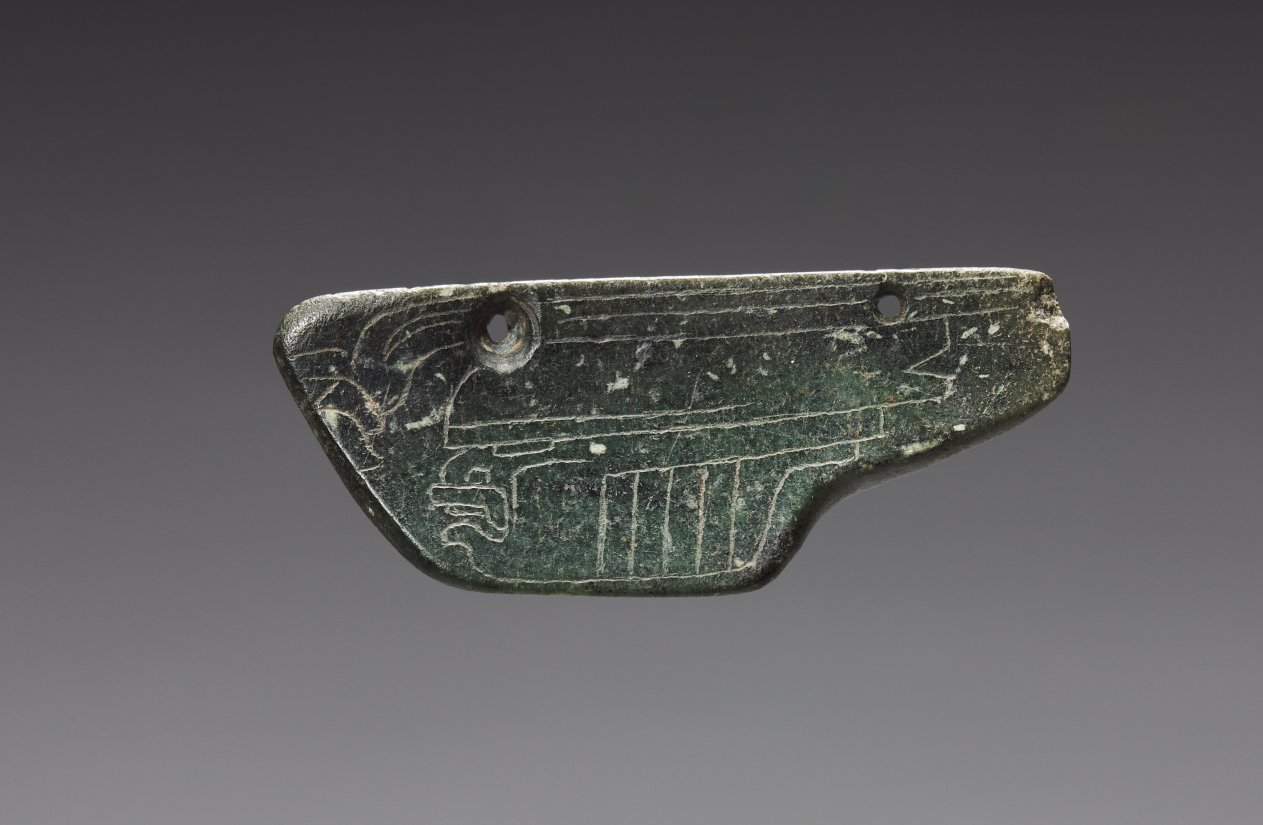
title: Mask Attachment(?)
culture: Mesoamerica, Mexico, Olmec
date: 900–300 BCE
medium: serpentine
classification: Sculpture